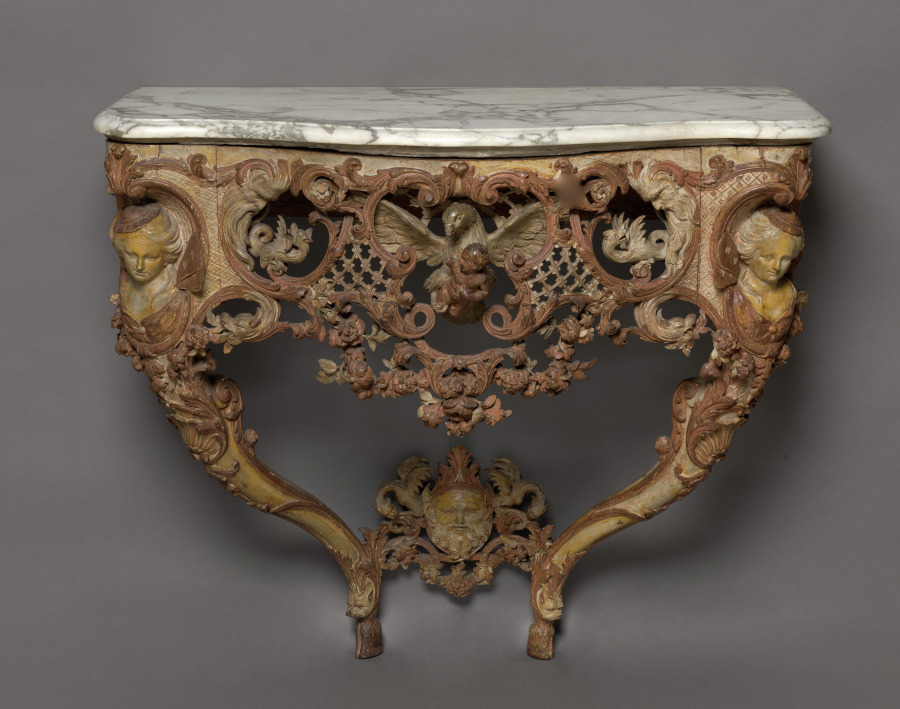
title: Console Table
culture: France, 18th century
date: c. 1720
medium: carved and painted wood, marble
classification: Furniture and woodwork